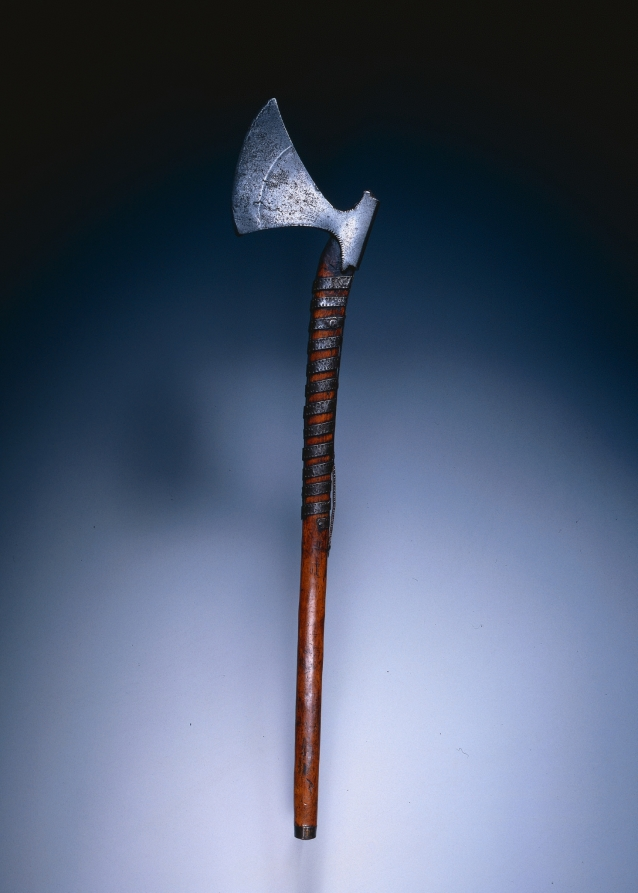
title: Battle Axe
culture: Scandinavia (?), 15th century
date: 1400s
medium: Steel and wood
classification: Arms and Armor